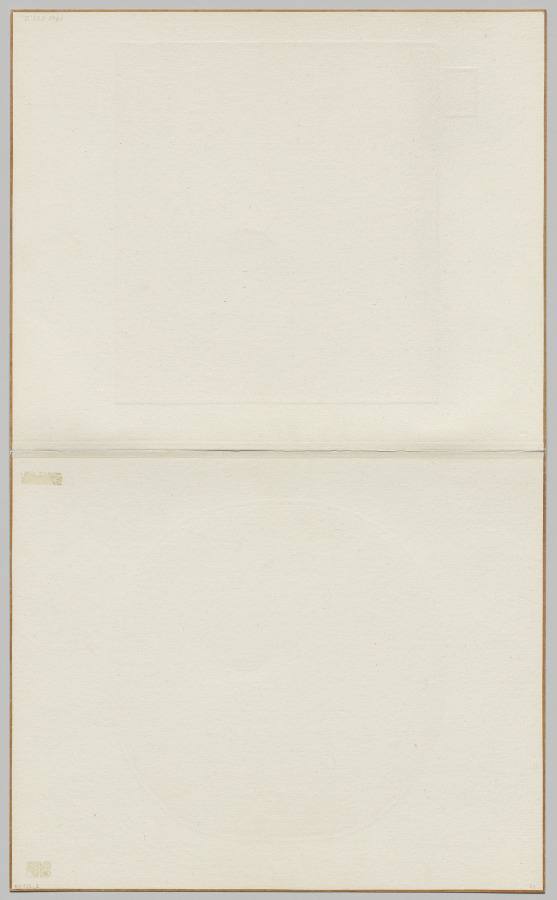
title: Poem by Wang Wei in the Cursive Script Style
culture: China, Southern Song dynasty (1127-1279)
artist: Song Lizong (Chinese, 1205–1264)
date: 1256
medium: Album leaf; ink on silk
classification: Calligraphy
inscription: 行到水窮處 坐看雲起時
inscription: The inscription between the two imperial seals reads, "Presented to Chung-kuei".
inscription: The top gourd-shaped seal has the cyclical date "bingchen" (丙辰 1256); the lower square seal is the Seal for Imperial Calligraphy.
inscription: The facing leaf has an inscription by Zhang Daqian 張大千 (1899–1983).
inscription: 1 seal of Chu Sheng-chai (20th Century) remounted onto the facing leaf to the left of the square calligraphy.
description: Poem and painting, once mounted together as one fan, exemplify the collaboration between imperial patron and court painter. Emperor Lizong’s calligraphy cites a verse from Wang Wei’s (701–761) poem, Walking to where the water ends, I sit and watch when clouds arise. Ma Lin’s response is this painting. At the water’s edge, a scholar reclines by a large rock. The view leads across the empty middle ground to a distant mountain. With sparse ink and subtly graded washes, Ma Lin visualizes the poetic verse. The painting suggests the impact of Chan aesthetics through interaction between the palace, literati-officials, and monasteries around Hangzhou. The leaf facing Emperor Lizong’s calligraphy has an inscription by Zhang Daqian (1899–1983).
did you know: Emperor Lizong had little interest in governmental affairs, but he was perhaps the finest calligrapher among the Song emperors.